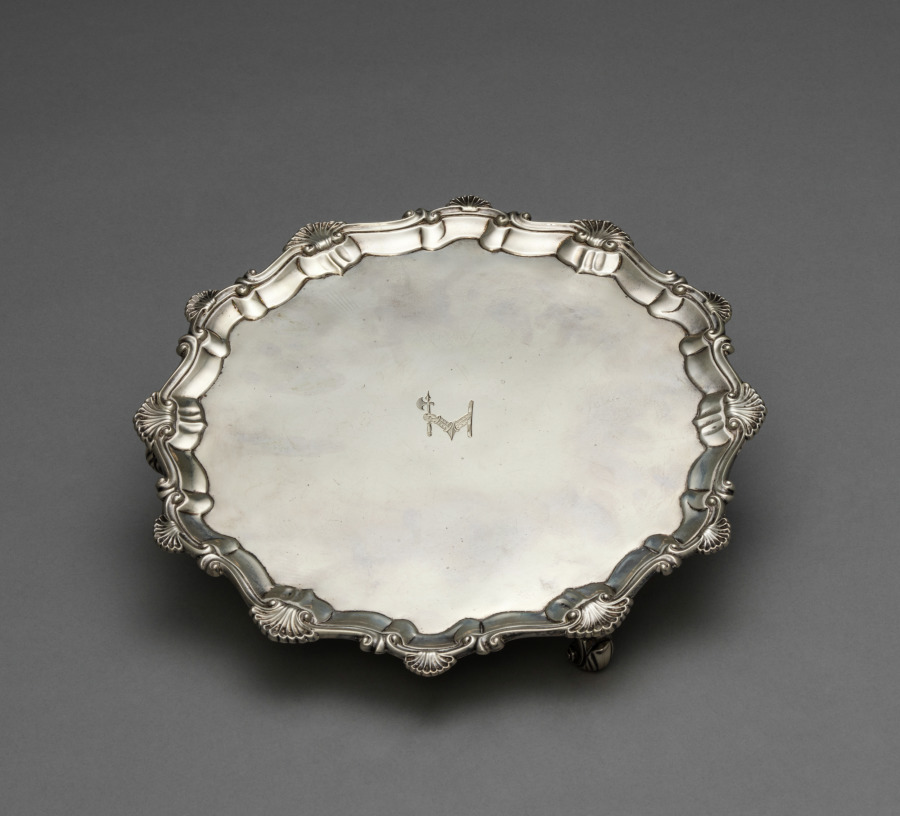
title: Salver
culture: England, 18th century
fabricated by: Ebenezer Coker (British)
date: 1769–1770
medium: silver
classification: Silver